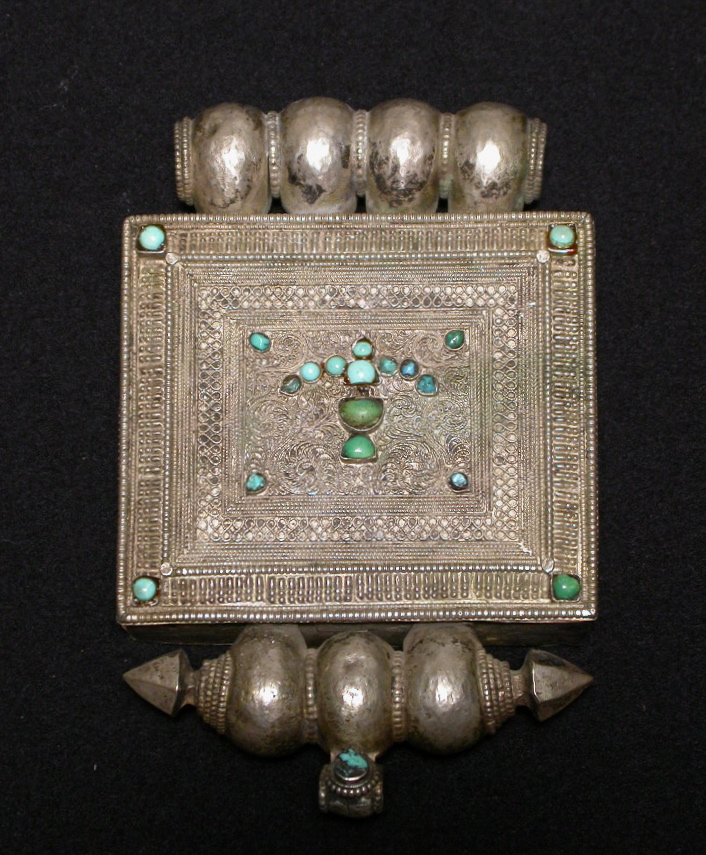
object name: Costume and Accessories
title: Woman's Amulet Box (Ga'u)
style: Himalayan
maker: Tibet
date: 18th century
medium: Silver and turquoise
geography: Tibet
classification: silver; metal; jewelry; asian art; costume